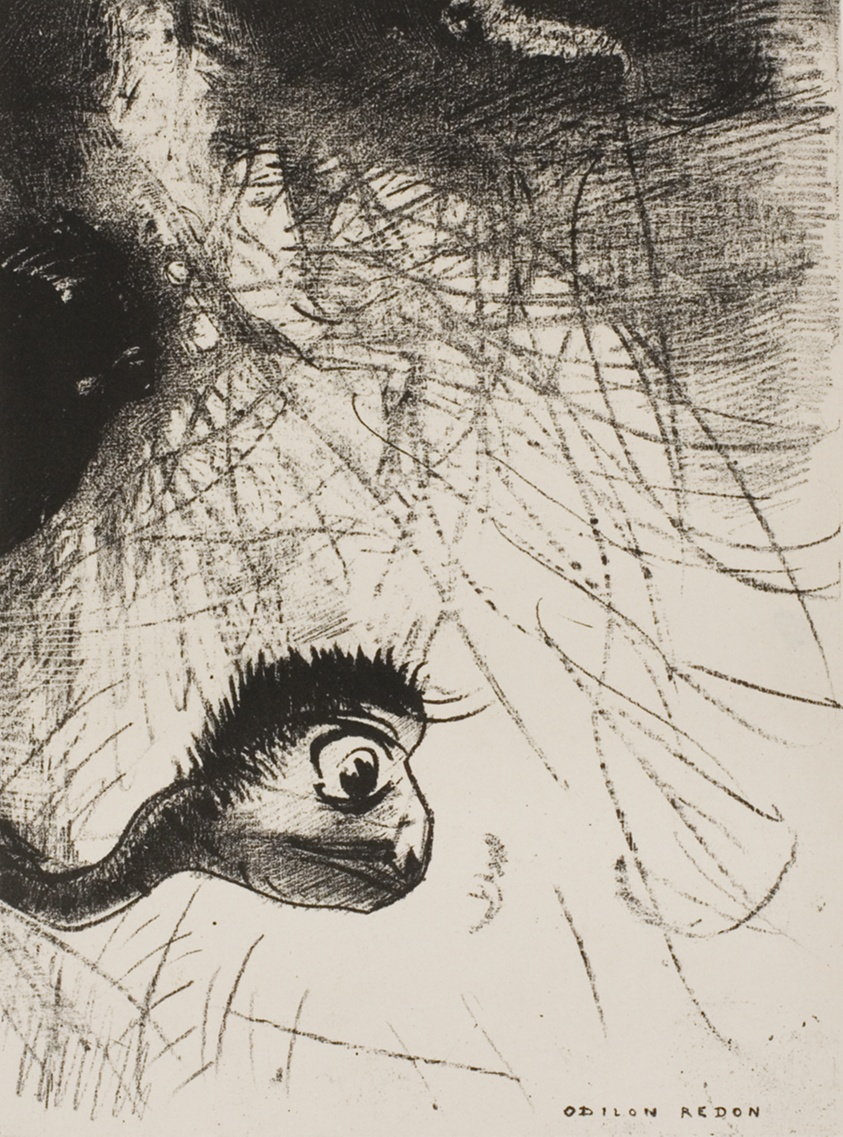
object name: Print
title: St. Anthony: "Somewhere There Must Be Primordial Shapes Whose Bodies Are Only Images", plate 4 of 6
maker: Odilon Redon (French, 1840-1916)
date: 1889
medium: Lithograph in black on cream China paper laid down on cream wove paper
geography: France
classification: lithograph; print; prints and drawing; paper